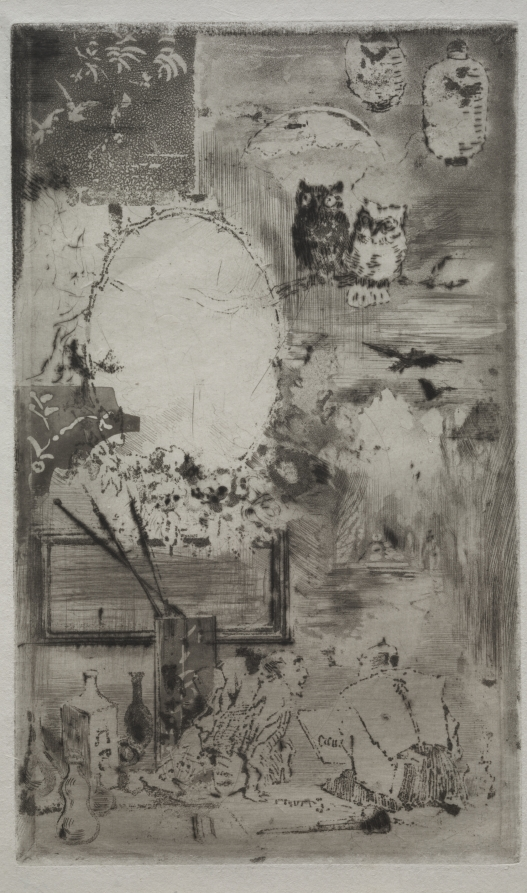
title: Baptism in the Japanese Style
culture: France, 19th century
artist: Félix Hilaire Buhot (French, 1847–1898)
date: 1887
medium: etching, drypoint and aquatint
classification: Print